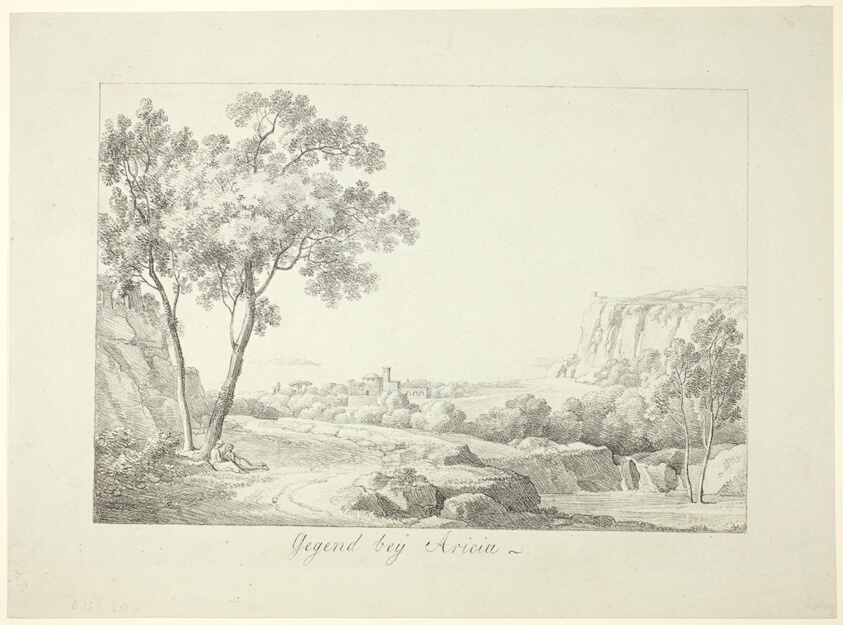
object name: Print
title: Region of Aricia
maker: Simon Petrus Klotz (German, 1776-1824)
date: 1806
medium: Lithograph on greenish wove paper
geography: Germany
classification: lithograph; print; prints and drawing